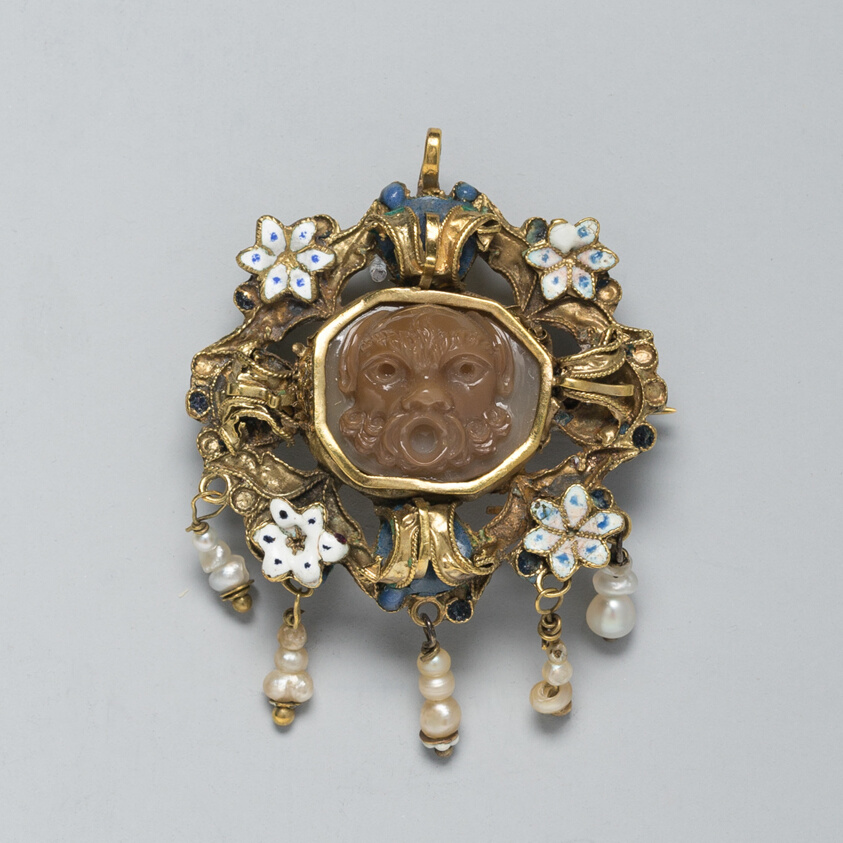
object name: Costume and Accessories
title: Dress Ornament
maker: South German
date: 16th century (cameo); 17th century (mount)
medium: Agate, gold, enamel, and pearls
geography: Germany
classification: jewelry; european decorative arts; costume